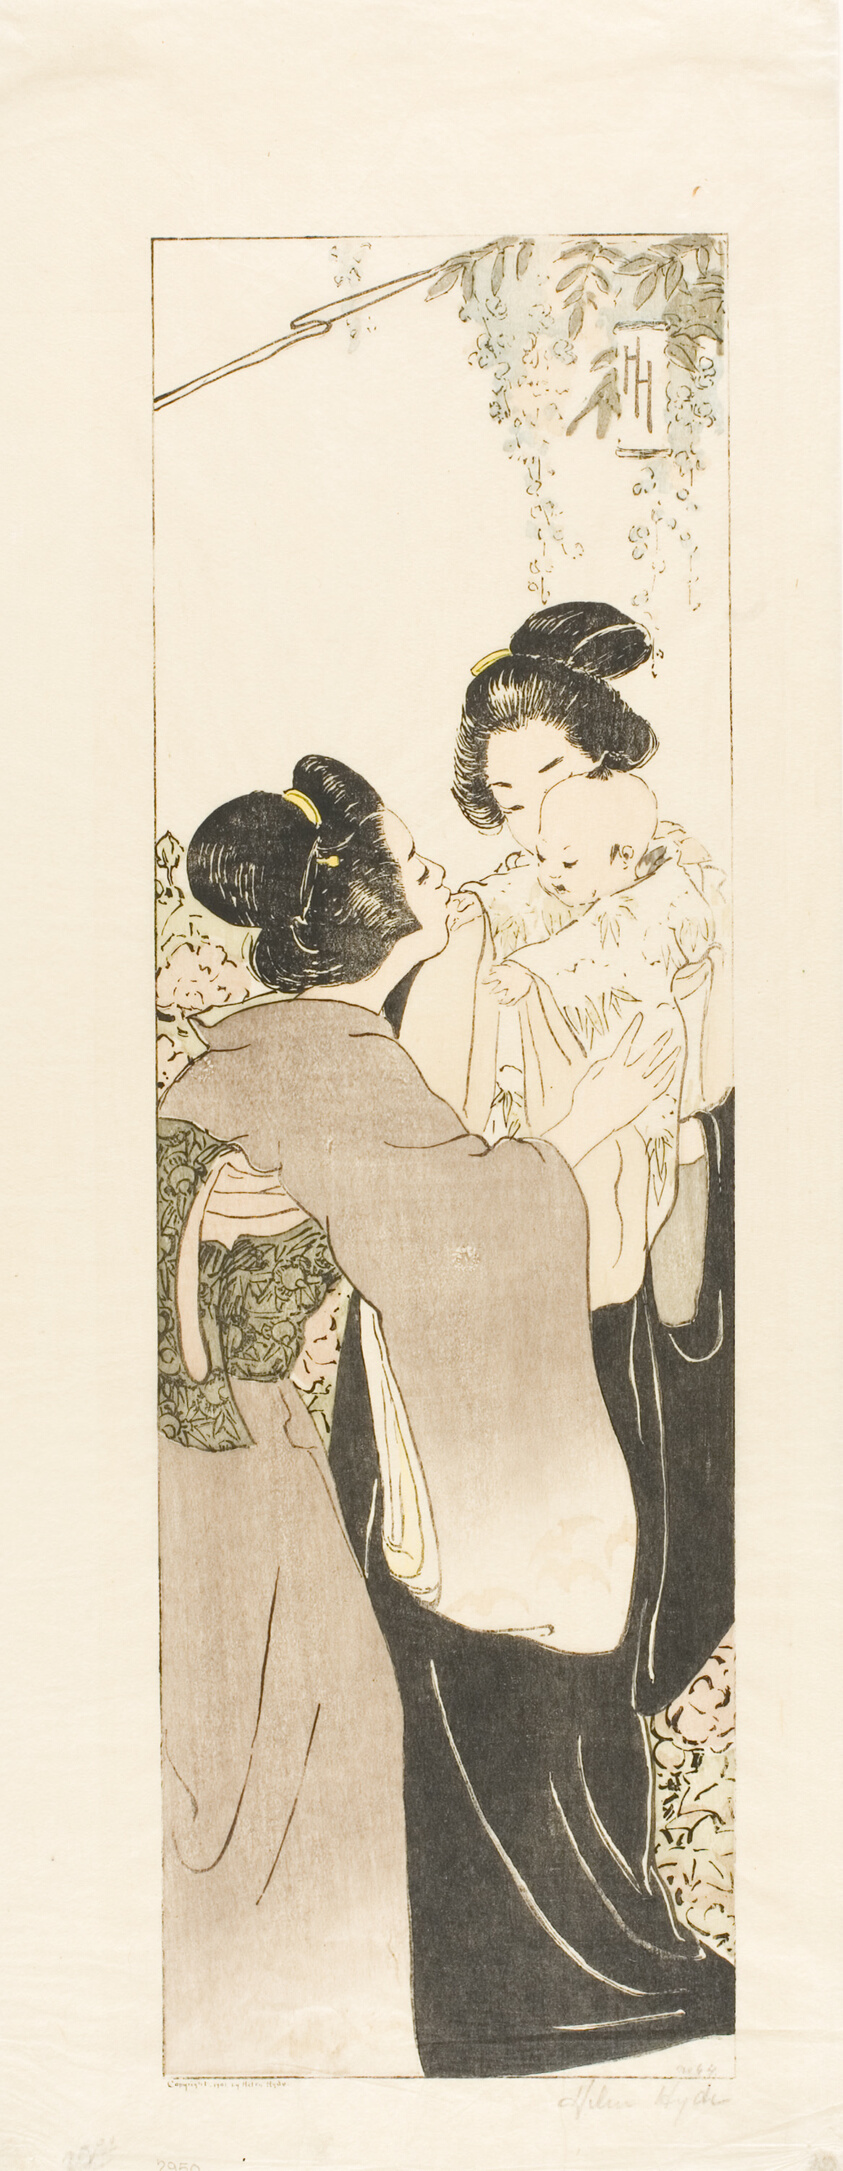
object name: Print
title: A Monarch of Japan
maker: Helen Hyde (American, 1868-1919)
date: 1901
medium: Color woodcut on ivory Japanese paper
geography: United States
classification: woodcut; print; prints and drawing